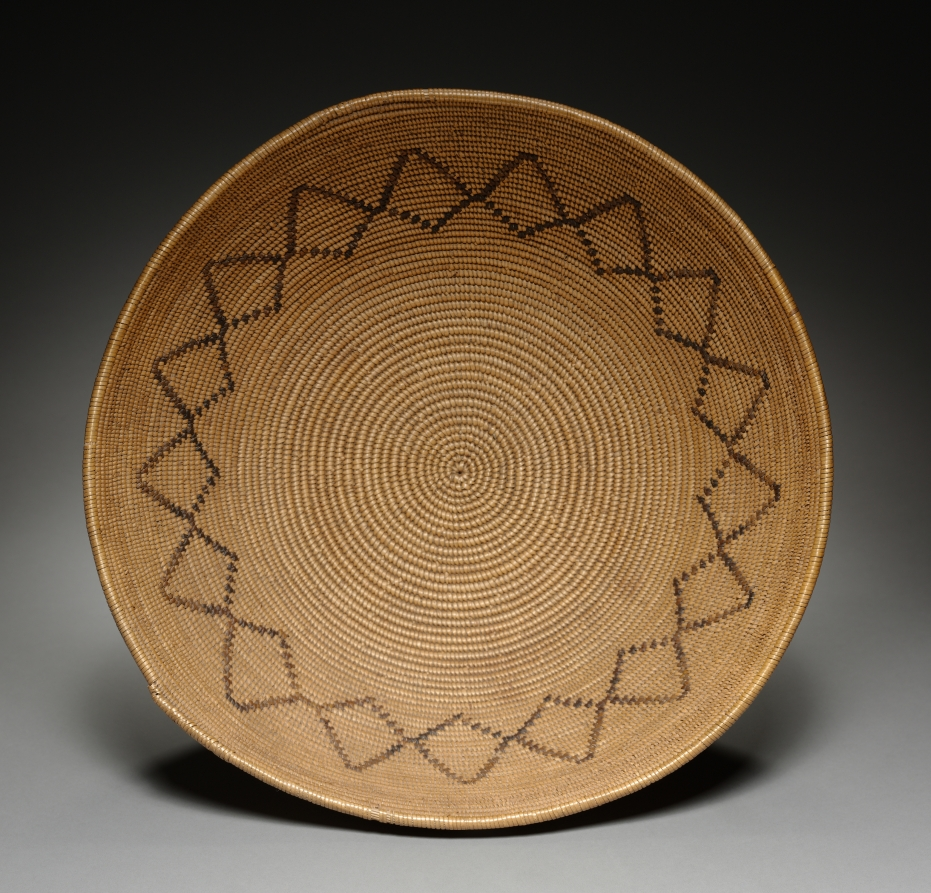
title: Bowl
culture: California, Southern, Gabrielino (San Gabriel, Mission or Tongva), Late 19th- Early 20th century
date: c 1875– 1925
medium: coiled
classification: Basketry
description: CMA Bulletin, December 1930